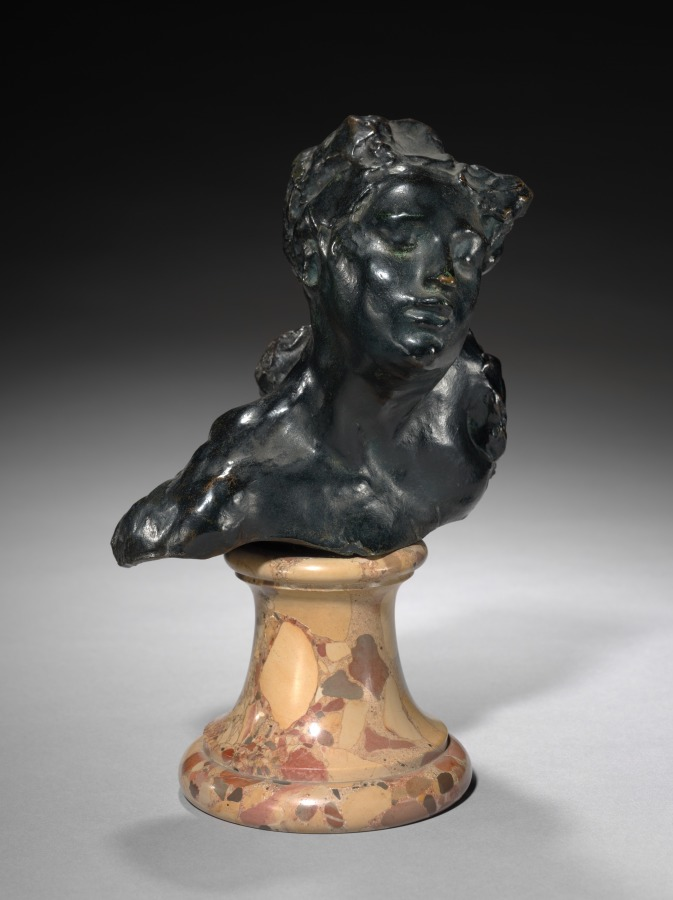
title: Head of the Little Martyr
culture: France, late 19th-early 20th century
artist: Auguste Rodin (French, 1840–1917)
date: c. 1880 – 1885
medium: bronze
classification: Sculpture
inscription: Signed sinister side: "A. Rodin"; inside front in relief: "A. Rodin"